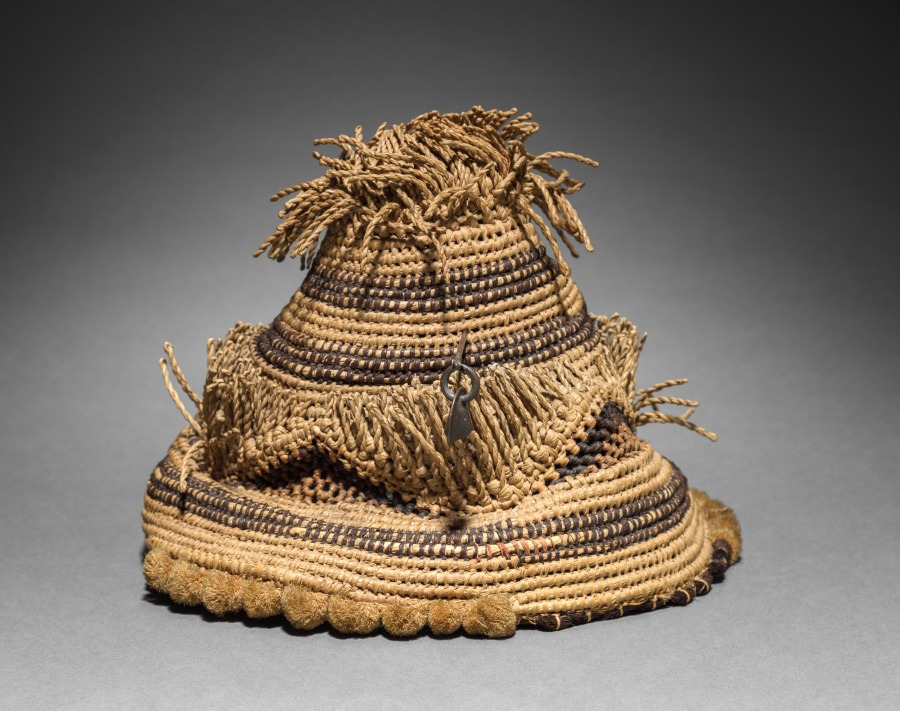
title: Hat (laket mishiing) with Pin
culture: Africa, Central Africa, Democratic Republic of Congo, early 20th century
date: early 1900s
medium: Raffia, metal, and dye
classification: Garment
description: Titled Kuba men and prominent women wear the laket, a small ornate dome-shaped hat. An essential fashion item of adult men in good social standing, it focuses special attention on the head as a significant marker of individual identity, ethnic affiliation, status, and role in society. This prestige object is secured on the crown of the head with a nine-and-a-half-inch metal pin that pierces through the hat onto a clump of hair. The laket is made from raffia palm fiber coiled into threads and woven in two alternating patterns and contrasting light and dark (dyed) wefts. There are two examples of the laket: the plain type with the flat top, and the more elaborate type called the laket mishiing.